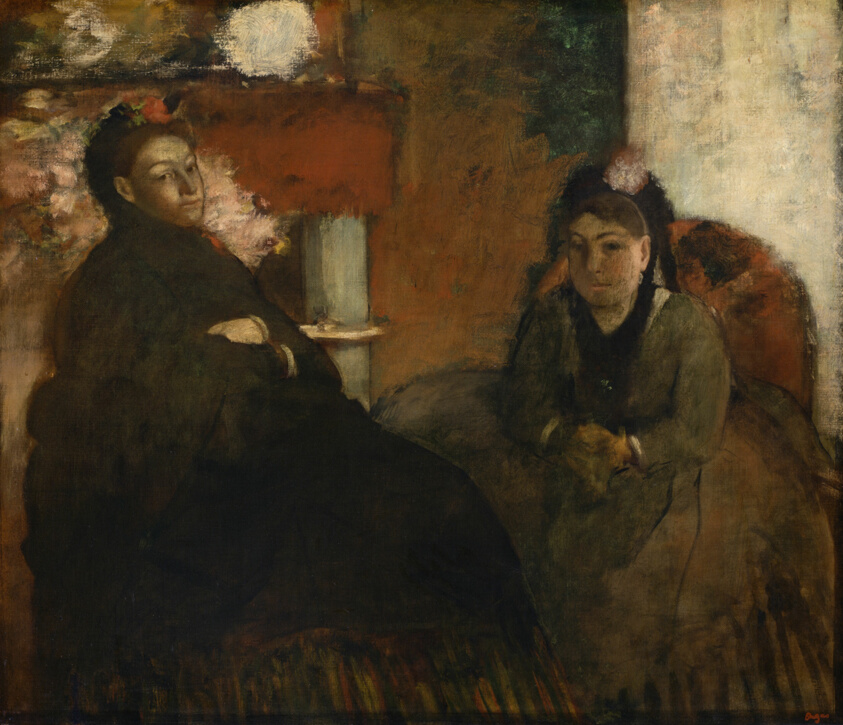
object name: Painting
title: Portrait of Mme Lisle and Mme Loubens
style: Impressionism, 19th century, nineteenth century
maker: Edgar Degas (French, 1834–1917)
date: c. 1867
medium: Oil on canvas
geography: France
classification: painting; portrait; oil on canvas; paint; french; france; european painting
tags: portraits: female subject, chair, curtains, dresses, flowers, France, French, interior, portrait, portraits, portraits: European subject, portraits: French subject, portraits: multiple subjects, women